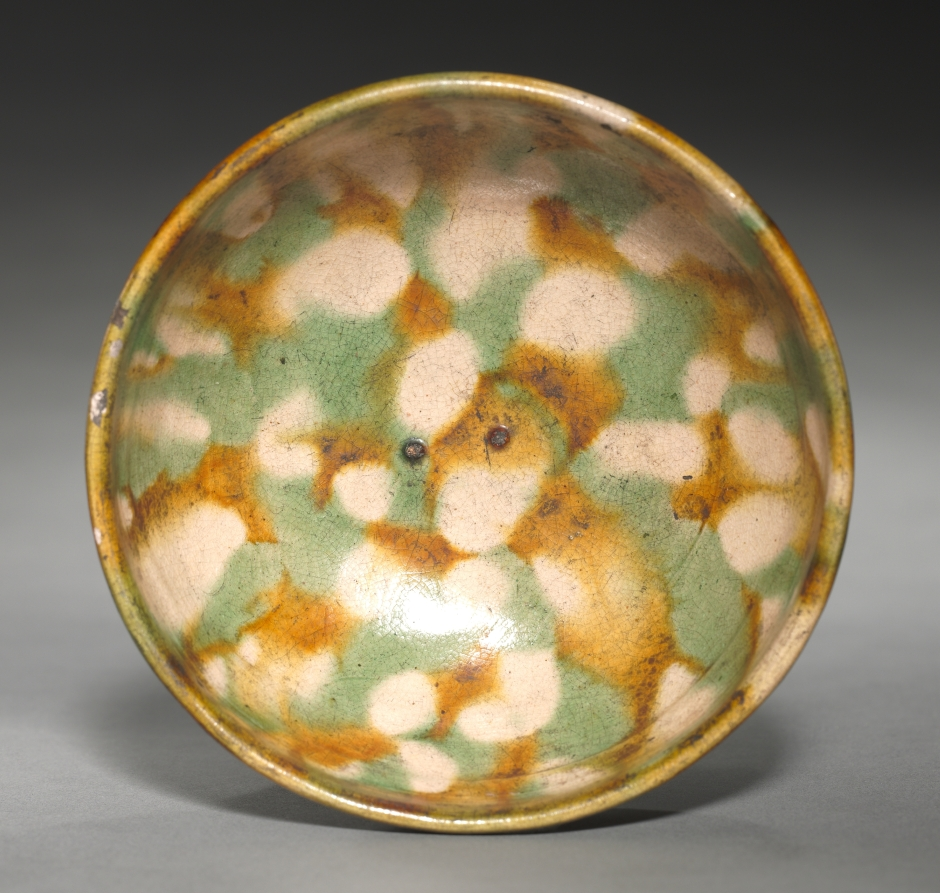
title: Bowl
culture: China, Tang dynasty (618-907)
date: 618–906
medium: glazed earthenware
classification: Ceramic